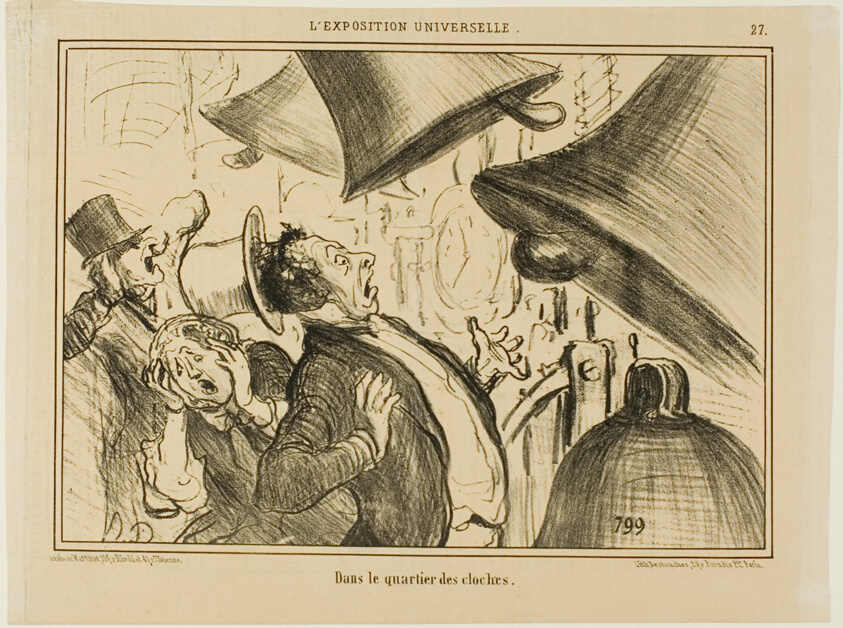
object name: Print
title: In the bell section, plate 27 from L'exposition Universelle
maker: Honoré Victorin Daumier; French, 1808-1879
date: 1855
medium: Lithograph in black on buff wove paper, with letterpress verso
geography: France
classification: lithograph; print; prints and drawing